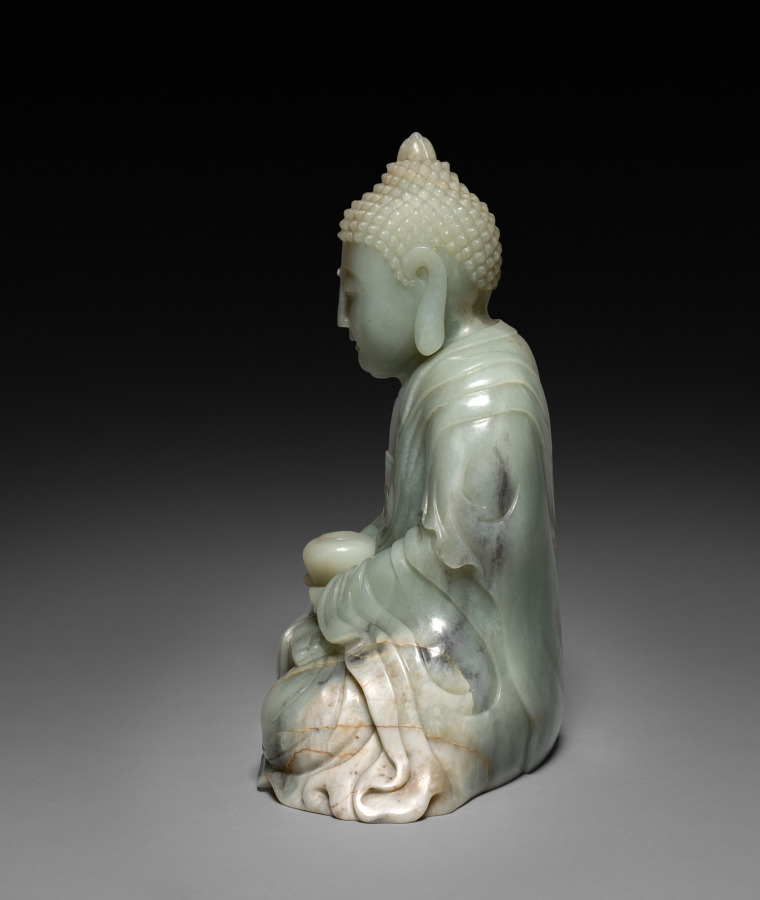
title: Seated Buddha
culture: China, Qing dynasty (1644-1911)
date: 1700s–1800s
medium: jade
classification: Jade